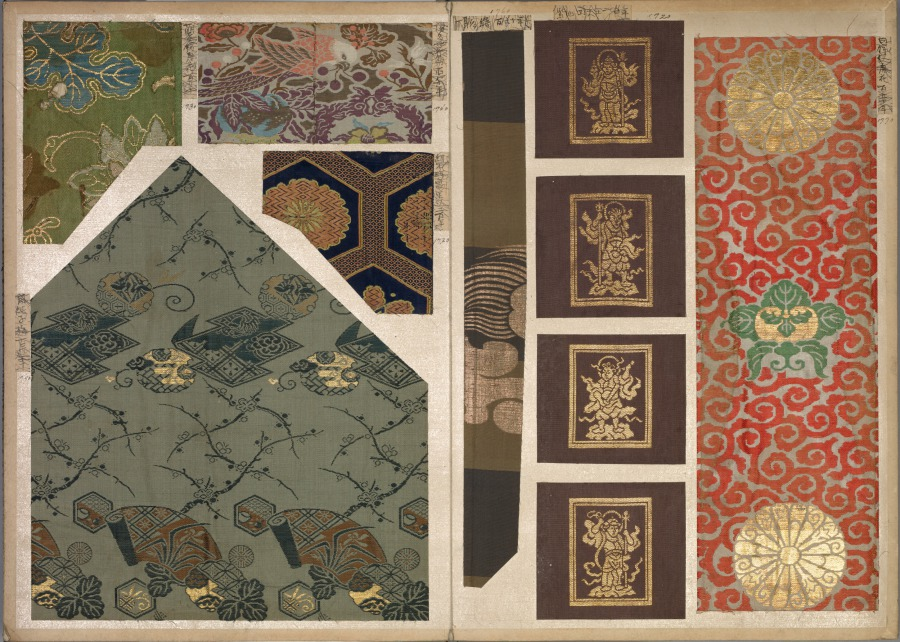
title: Album of Textile Samples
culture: Japan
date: 1790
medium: silk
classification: Textile